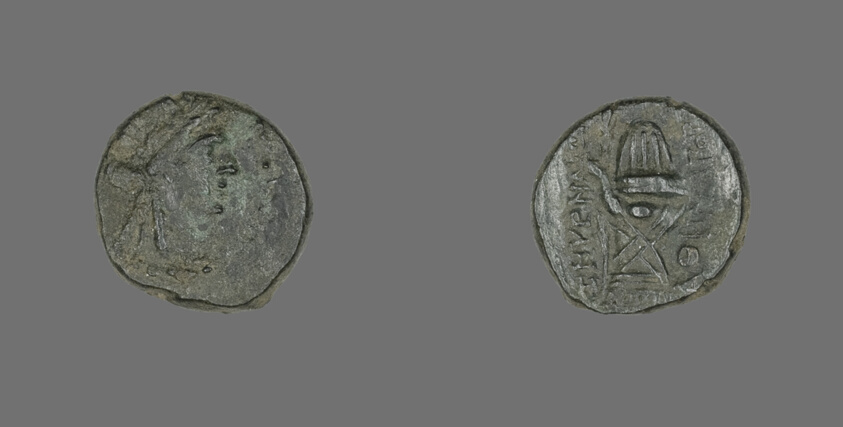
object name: Coin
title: Coin Depicting the God Apollo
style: greek, ancient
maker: Greek, minted in Smyrna, Ionia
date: 75-50 BCE (?)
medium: Bronze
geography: Ancient Greece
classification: coin; ancient art